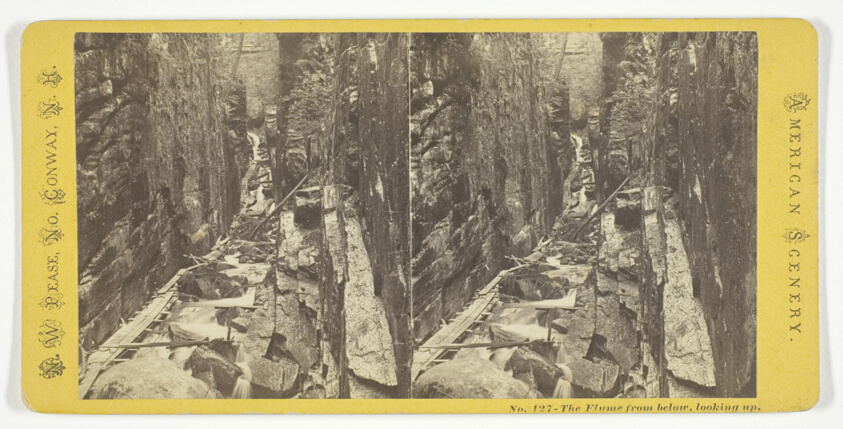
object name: Photograph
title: The Flume from below, looking up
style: 19th century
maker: N.W. Pease; American, active 1868-1878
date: Mid 19th century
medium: Albumen print, stereo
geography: New Hampshire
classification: photography; photograph